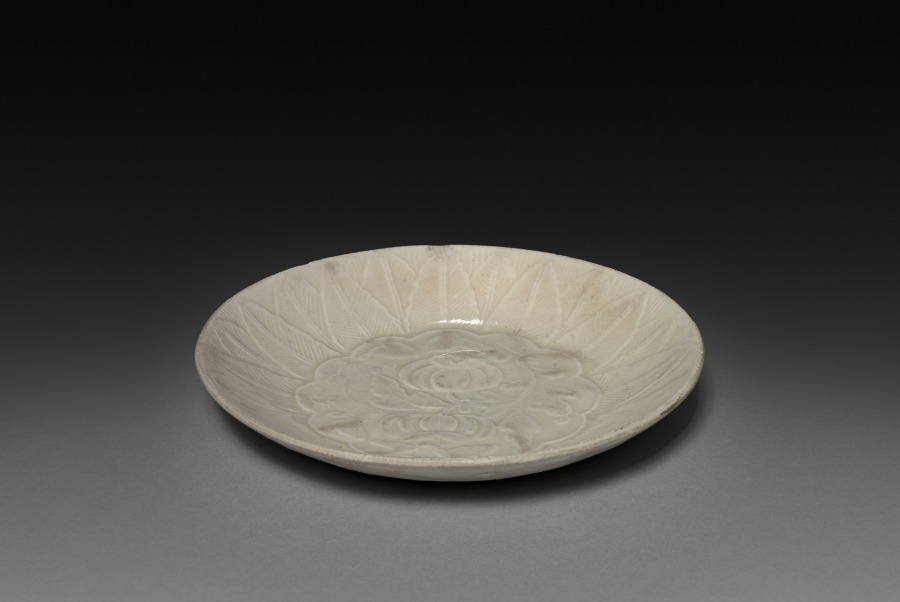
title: Saucer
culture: China, Jin dynasty (1115-1234)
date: 1100s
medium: glazed grayish-white porcelain, Ding ware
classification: Ceramic